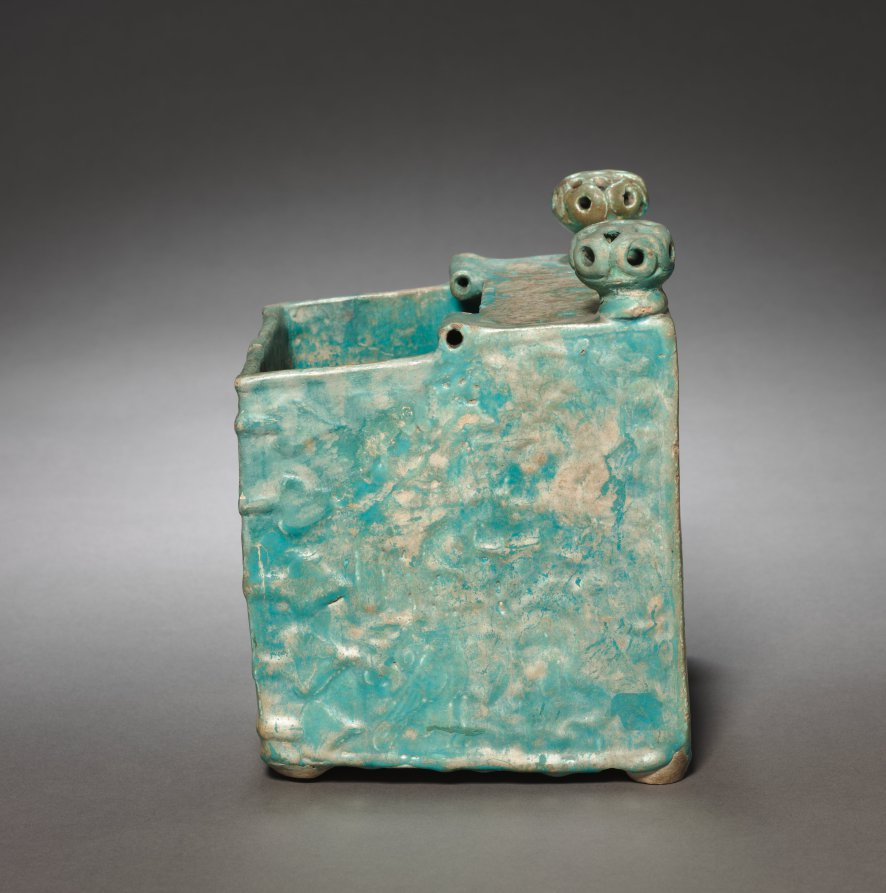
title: Casket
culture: Syria (Raqqa), Ayyubid Period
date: late 1100s–1200s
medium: fritware with molded design under glaze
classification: Ceramic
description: This square fritware box originally had a with hinged top. It is covered on the inside and outside with opaque turquoise glaze. The top back corners of the casket are surmounted by small openwork knobs. The casket would have rested on four feet, which have been lost. This is a ceramic imitation of a wooden box with metal fittings. The relief ornament imitates metal straps and a lock fitting.